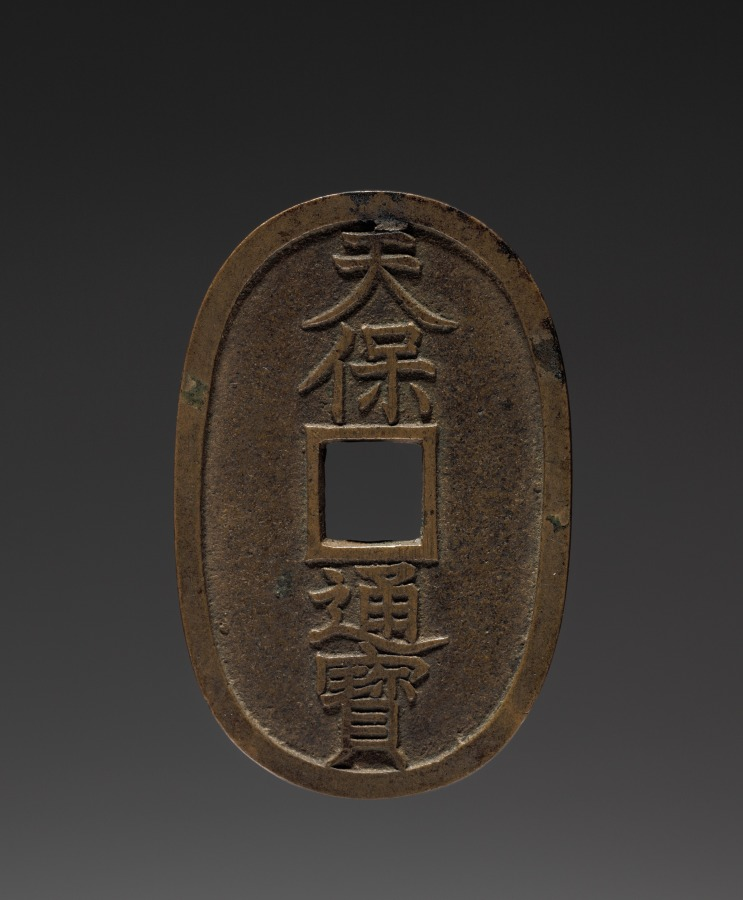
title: Tenpō Tsūhō Coin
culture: Japan, Edo period (1615–1868)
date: 1835–68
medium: copper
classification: Coins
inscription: 天保通寶